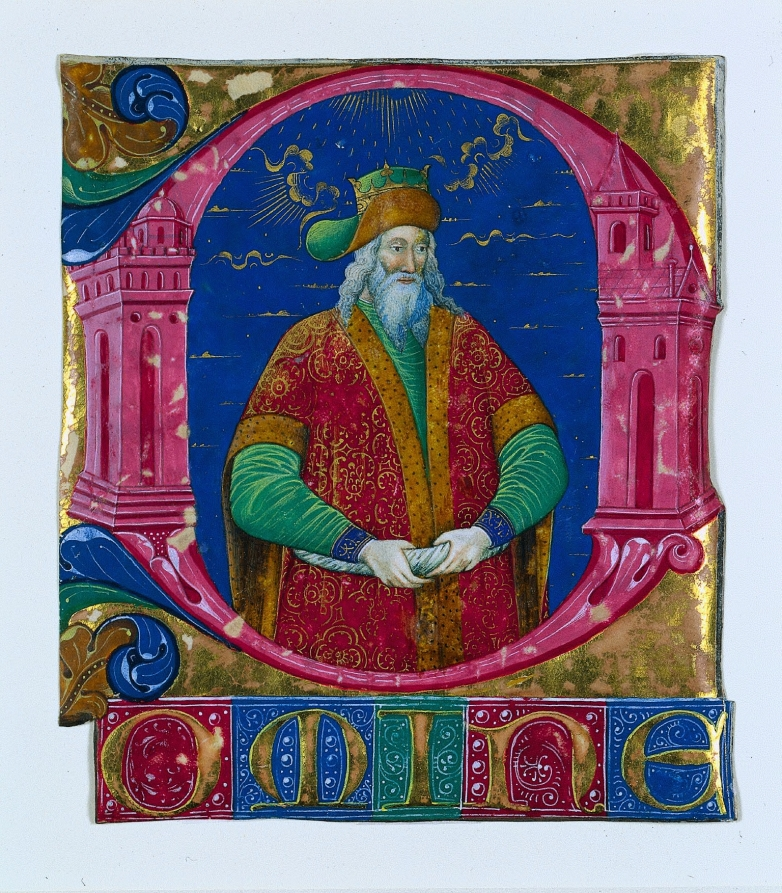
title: Initial D[omine] from a Choral Book: King Solomon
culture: Italy, Ferrara, 15th century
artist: attributed to Guglielmo Giraldi del Magri [or del Magro] (Italian)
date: c. 1470–1480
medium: ink, tempera and gold on vellum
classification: Manuscript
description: The initial D takes the form of the Temple at Jerusalem, built by King Solomon, who occupies the initial's interior space. The remaining letters omine (the Latin word for Lord), reside beneath the D against grounds of alternating colors. This once was part of a group of Old Testament portraits decorating a choral book. Giraldi held a privileged reputation as an illuminator for the court of Borso d'Este, Duke of Ferrara (died 1471).